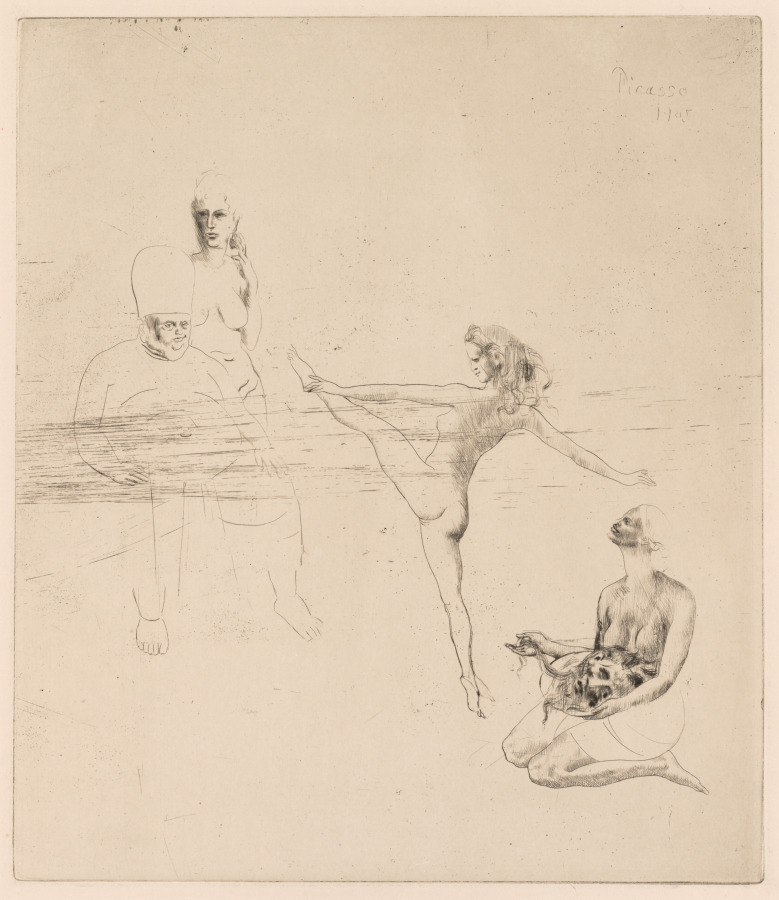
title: Salomé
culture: Spain, 20th century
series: The Saltimbanques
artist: Pablo Picasso (Spanish, 1881–1973)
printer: Louis Fort (French, active 1800s–1900s)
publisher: Ambroise Vollard (French, 1867–1939)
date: 1905, printed 1913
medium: etching and drypoint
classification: Print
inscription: Signed, upper right, in plate: Picasso / 1905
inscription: Watermark: VAN GELDER ZONEN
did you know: Around the same time that Picasso made this etching, his friend Guillaume Apollinaire also wrote a poem about the biblical figure of Salomé.